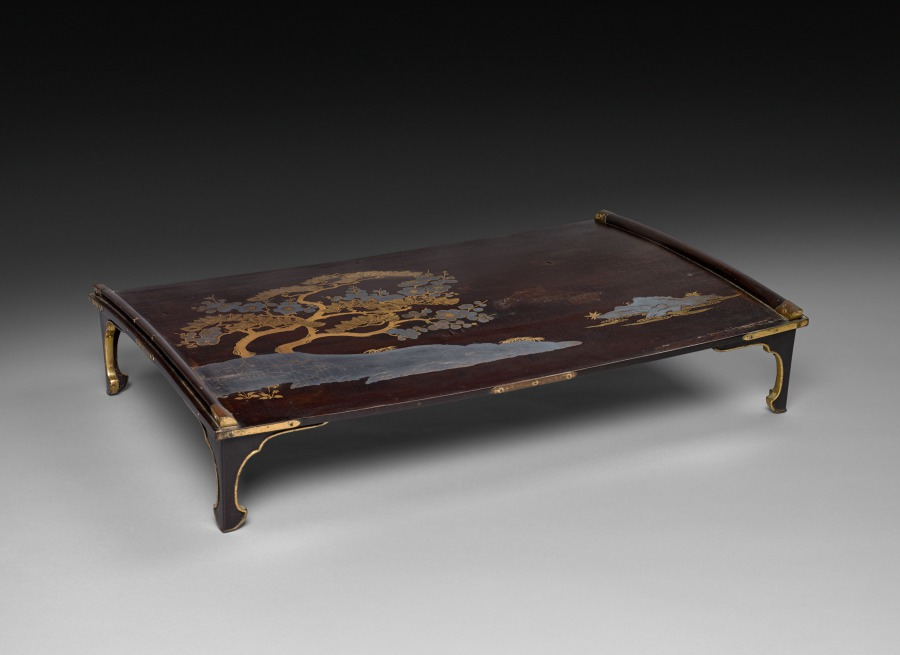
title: Writing Table with Pine, Bamboo, and Plum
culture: Japan, Muromachi period (1392–1573)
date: 1400s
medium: Lacquered wood with gold and silver sprinkled powder (maki-e) and metal fittings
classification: Lacquer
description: Low writing tables like this one were developed for use by those seated on the floor. They often had matching writing boxes. The table features the classic design of pine, bamboo, and plum, known together as the Three Friends of Winter. Indicating resilience in the face of harsh conditions, pine is evergreen, bamboo bends but does not break, and plum is the first flower to bloom in early spring. The plants are a metaphor for strength of character.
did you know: The trunks of the pine and plum are visible through the silver slopes of the ground plain.